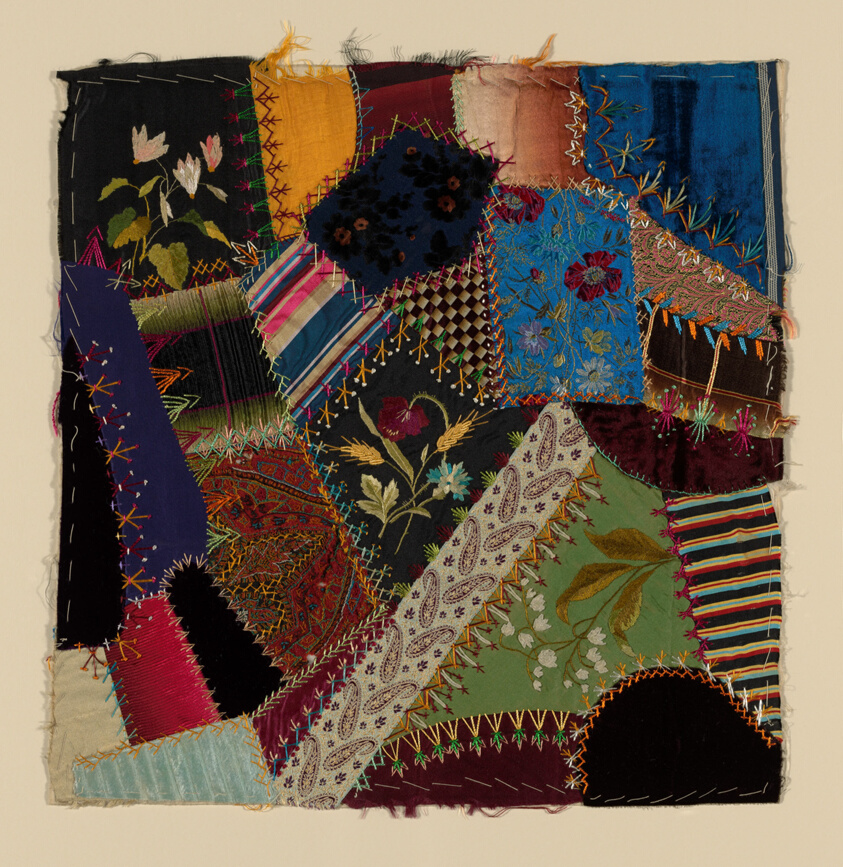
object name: Textile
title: Fragment from Bedcover (Crazy Quilt Block)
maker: United States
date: c. 1884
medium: Silk, satin, twill, and plain weaves; some with supplementary patterning warps or wefts, some self-patterned by main warps and ground wefts; some embroidered with silk and silk chenille yarns in bullion, satin, split and stem stitches; couching; some warp dyed; silk and silk and cotton, plain and satin weaves with supplementary pile warps forming cut solid and cut voided velvets; and wool, twill weave; embroidered in herringbone, satin and stem stitches; pieced; padded; backed with cotton, plain weave and embroidered with silk in cross, double feather, feather, fly, herringbone, knot, satin and split stitches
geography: United States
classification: needlework - quilt; textile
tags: curvilinear shapes, floral, grids, paisley, cubes, stripes, foliage, flowers